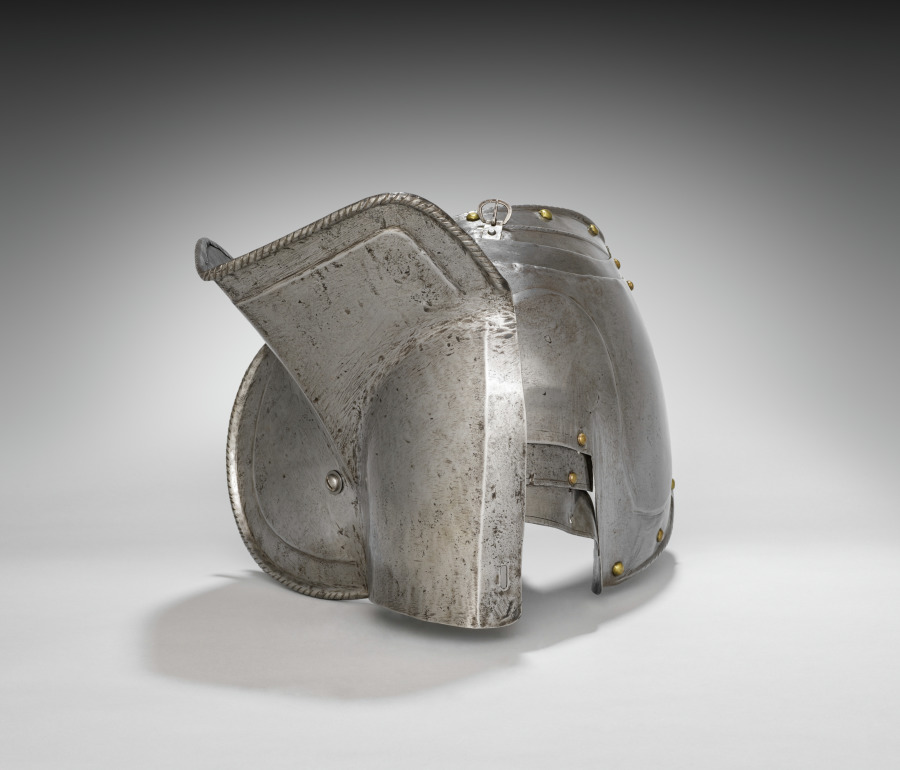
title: Pauldron (proper left) and Grandguard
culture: South Germany, 16th century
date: c. 1560–1580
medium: steel, leather straps, brass rivets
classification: Arms and Armor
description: This armor was developed for the joust--a sporting combat between two mounted contestants. Although all of the elements of this armor date from the same period, they are not all from the same suit. This armor is thus called "composed." It also shows the asymmetry of jousting armor. The participants rode along a wall-like barrier known as a "tilt" with their left sides facing one another. Consequently, armor on that side of the body had to be thicker. Note the large plate (grandguard) over the left shoulder for extra protection. Also, the breathing holes in the helmet were placed on the right side (farthest from an opponent's lance) to avoid injuries from splinters. The bracket attached to the right breastplate is called the lance-rest, a shock-absorbing support designed to accommodate the lance when "couched" under the right armpit.